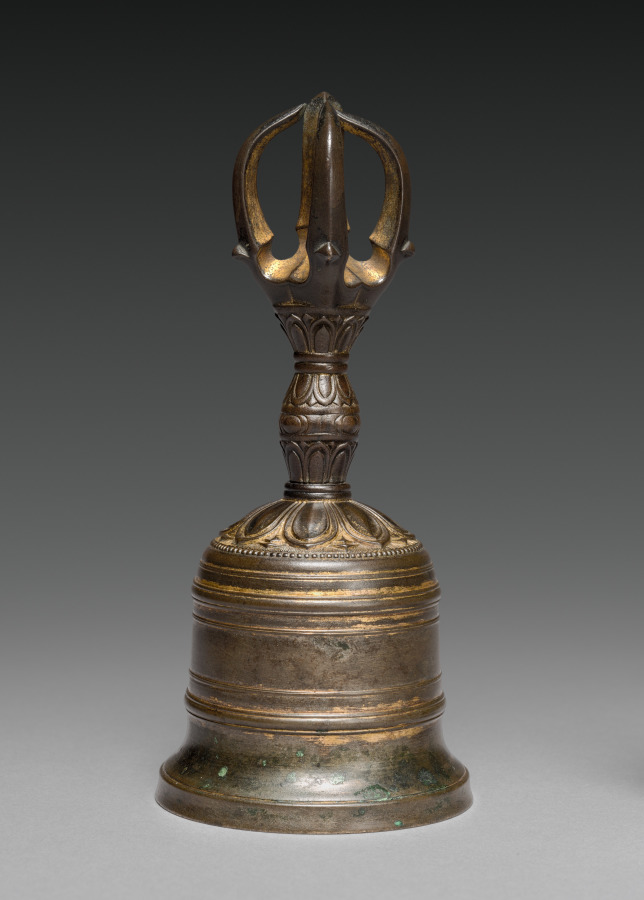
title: Five-pronged Vajra Bell (Gokorei)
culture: Japan, Kamakura period (1185–1333)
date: early 1300s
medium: gilt bronze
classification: Metalwork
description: The five prongs of this bell symbolize the Buddhist “Five Perfections”—generosity, morality, patience, perseverance, and concentration. The mouth of the bell symbolizes the “Sixth Perfection” of wisdom. The bell was used in Japanese Esoteric Buddhist rituals along with vajra pestles, or kongōsho.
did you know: Vajras are symbolic weapons, representing the properties of a diamond (indestructibility) and a thunderbolt (irresistible force), still used in Buddhist ceremonies today.